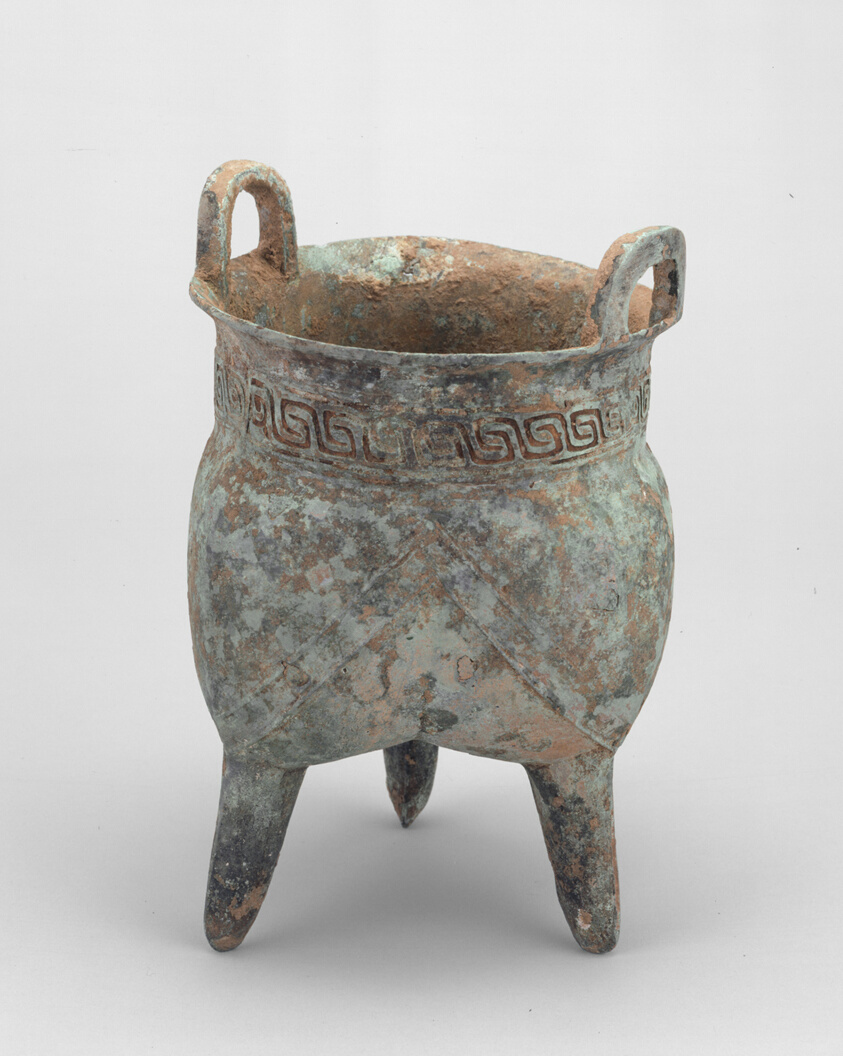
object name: Vessel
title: Tripod Food Container (Li)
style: Chinese (culture or style)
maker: China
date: Shang dynasty, Erligang period (c. 1500–1400 B.C.)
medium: Bronze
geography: China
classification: vessel; bronze; metal; asian art